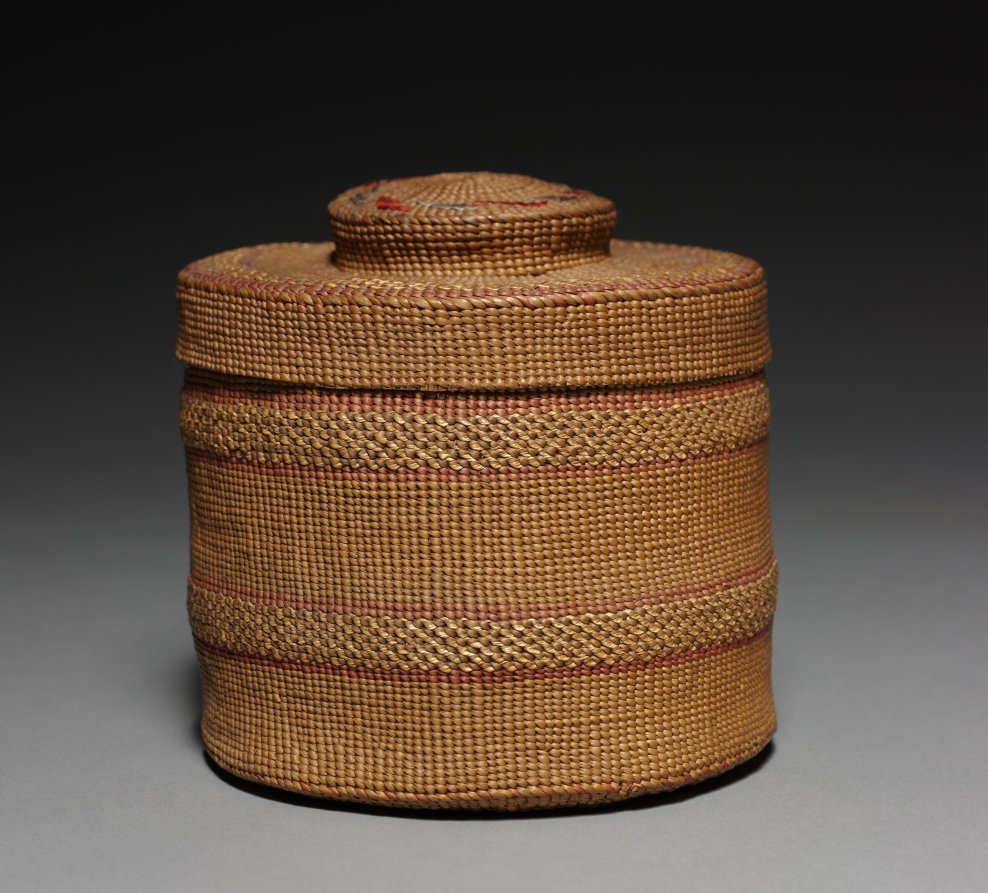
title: Covered Basket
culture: Northwest Coast, Haida, Unassigned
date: Unassigned, before 1917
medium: twilled, imbricated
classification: Basketry